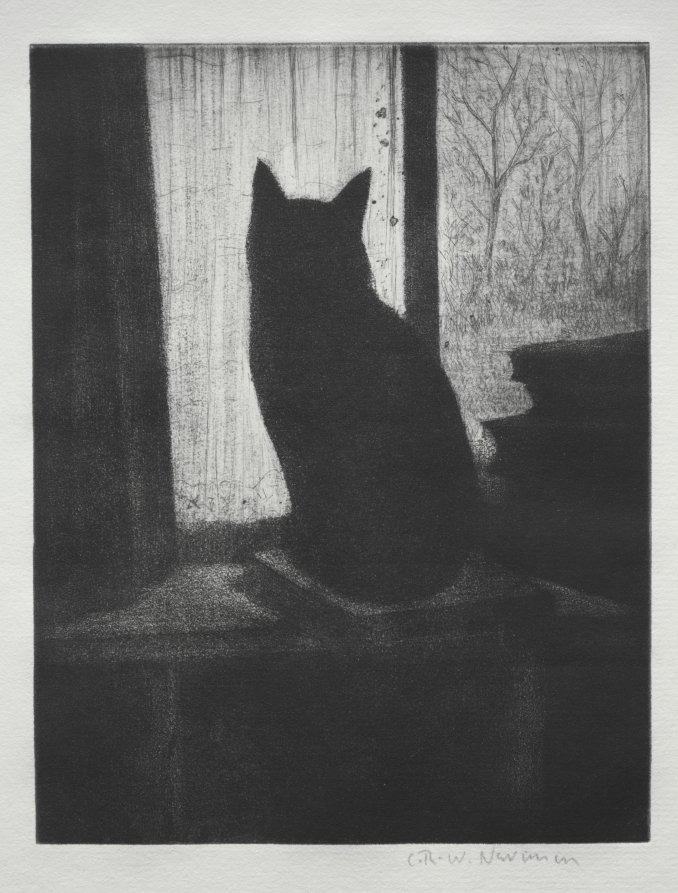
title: The Cat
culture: England, 20th century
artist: Christopher Nevinson (British, 1889–1946)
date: 1900s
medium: aquatint and etching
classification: Print